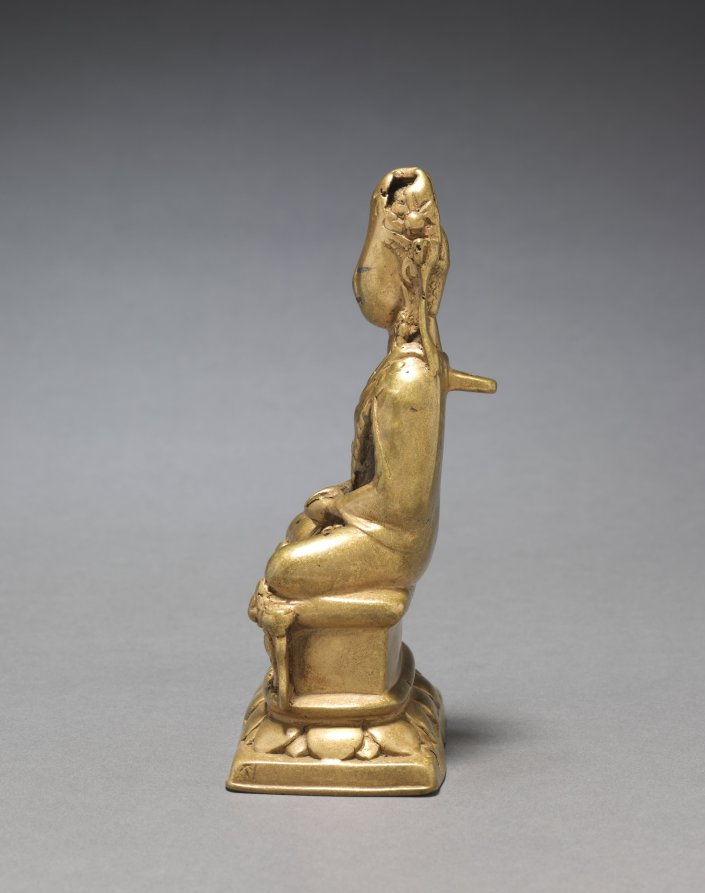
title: Crowned Buddha Seated on a Lion Throne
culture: India, Kashmir, 8th century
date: 700s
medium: brass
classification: Sculpture